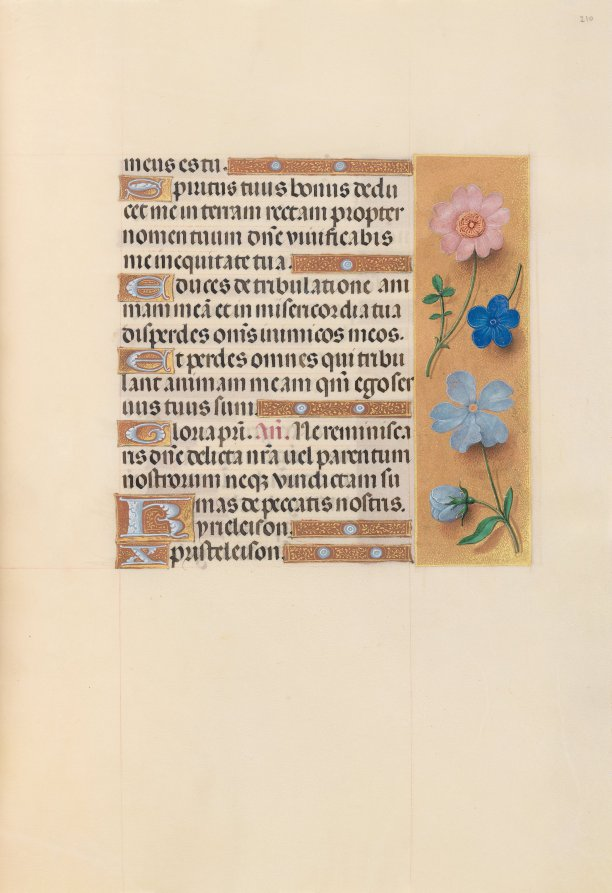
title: Hours of Queen Isabella the Catholic, Queen of Spain: Fol. 210r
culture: Flanders, Ghent and Bruges, late 15th century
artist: Master of the First Prayerbook of Maximillian (Flemish, c. 1444–1519)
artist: and Associates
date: c. 1500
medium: ink, tempera, and gold on vellum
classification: Bound Volume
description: This manuscript was illuminated by a circle of at least five highly organized manuscript painters active in the Flemish cities of Ghent and Bruges. The principal illuminator was Alexander Bening, who painted the majority of the book's miniatures. Manuscripts produced by this circle of artists are renowned for the decoration of their borders, which typically feature a rich variety of realistically-painted flowers, birds, and butterflies. This prayer book, called a book of hours, was intended not for a cleric, but for the private devotions of a lay person-in this case, Isabella the Catholic, Queen of Spain (1451-1504). Isabella's coat of arms embellishes the book's frontispiece. It is unlikely that the book was commissioned by the Queen herself; rather, she probably received it as a diplomatic gift from someone courting her patronage, perhaps Cardinal Francisco Jimenez de Cisneros. A Franciscan friar, Jimenez was dependent upon Isabella for his advancement, first to the post of Queen's confessor in 1492, and then to Archbishop of Toledo in 1495.